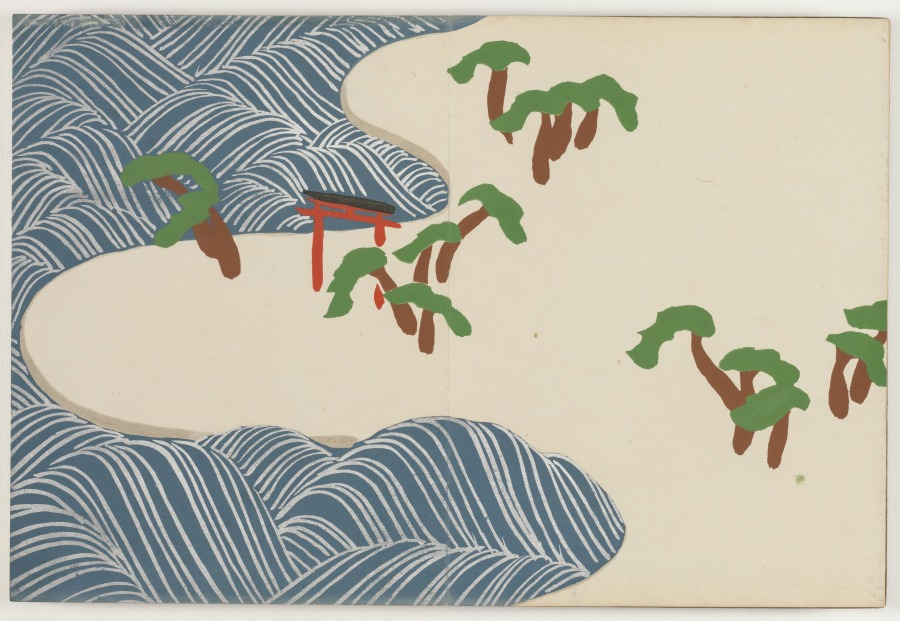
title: Flowers of a Hundred Worlds (Momoyogusa): Suminoe (Suminoe)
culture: Japan, Meiji period (1868–1912)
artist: Kamisaka Sekka (Japanese, 1866–1942)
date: 1909–10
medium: color woodcuts with gold and silver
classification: Bound Volume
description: This print from a set of three woodblock printed albums displays the graphic design prowess of Kamisaka Sekka. The images were first distributed one by one to subscribers to the series but later were reissued in bound form, like this book, for mass consumers. Each print features a vignette taken from nature or Japanese literature. Many of the scenes have a long history in Japan, originating in the 900s or 1000s and having been interpreted by all manner of artists since that time. Sekka’s selections hew closely to precedents from the Rinpa style originated by painter Tawaraya Sōtatsu (c. 1570–c. 1640) and calligrapher Hon’ami Kōetsu (1558–1637).